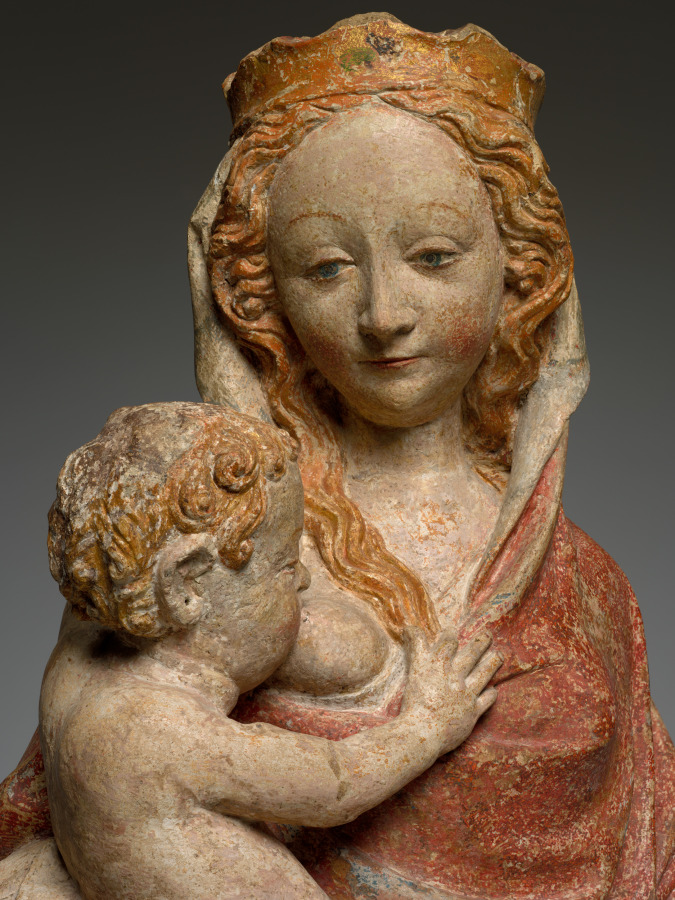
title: Virgin Nursing the Christ Child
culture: France, Île de France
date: c. 1370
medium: painted limestone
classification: Sculpture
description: This sculpture of the Virgin Mary nursing the Christ child subtly emphasizes the intimate relationship between mother and child and brings the Son of God in his human existence closer to the viewer. The emotional interaction is characteristic of sculpture since the mid-1300s, especially in the circles close to the court of the French kings in Paris and Emperor Charles IV (reigned 1346–78) in Prague. These novel stylistic tendencies were possibly a reaction to the fear and uncertainty incurred by the first great plague wave in 1348.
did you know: The back of this sculpture is unfinished since it would have originally been placed against a wall or pier.